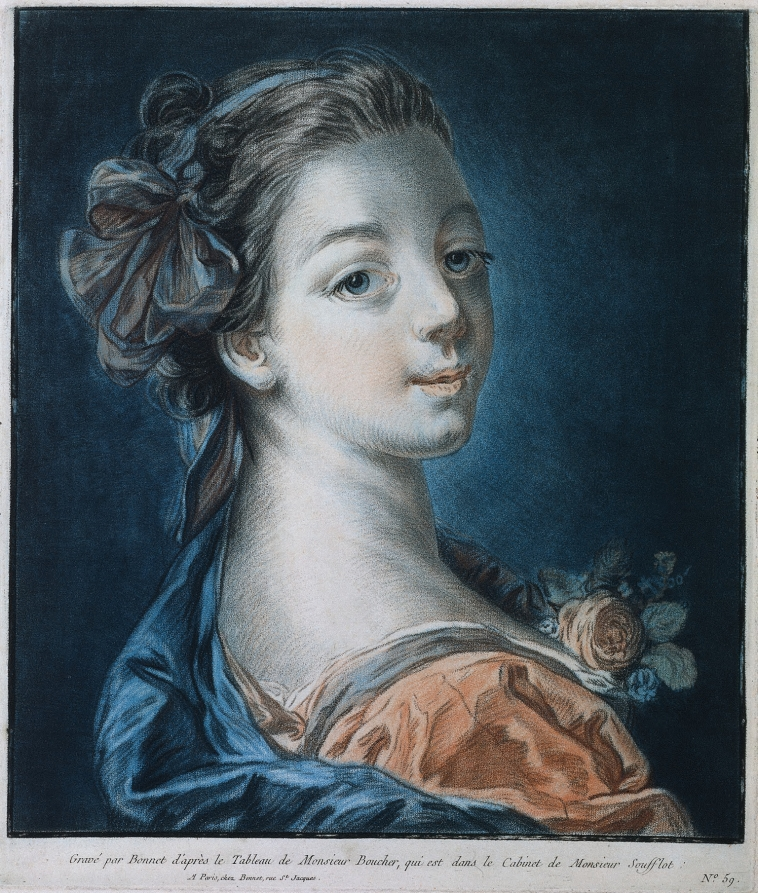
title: Head of a Woman (Mme. Deshayes?)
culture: France, 18th century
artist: Louis-Marin Bonnet (French, 1736–1793)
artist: after François Boucher (French, 1703–1770)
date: c. 1771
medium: color chalk-manner etching and engraving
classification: Print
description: To produce this print, Bonnet used three different printing plates to layer black ink, then semitransparent blue ink, and finally a thicker red pigment onto white paper. After the first run through the press, Bonnet had to carefully align each subsequent plate to achieve the desired coloration. Although the identity of this young woman is unknown, she may be Boucher’s daughter, Jean-Elisabeth Victoire, who married Jean-Baptiste Henri Deshays, a pupil of Boucher.